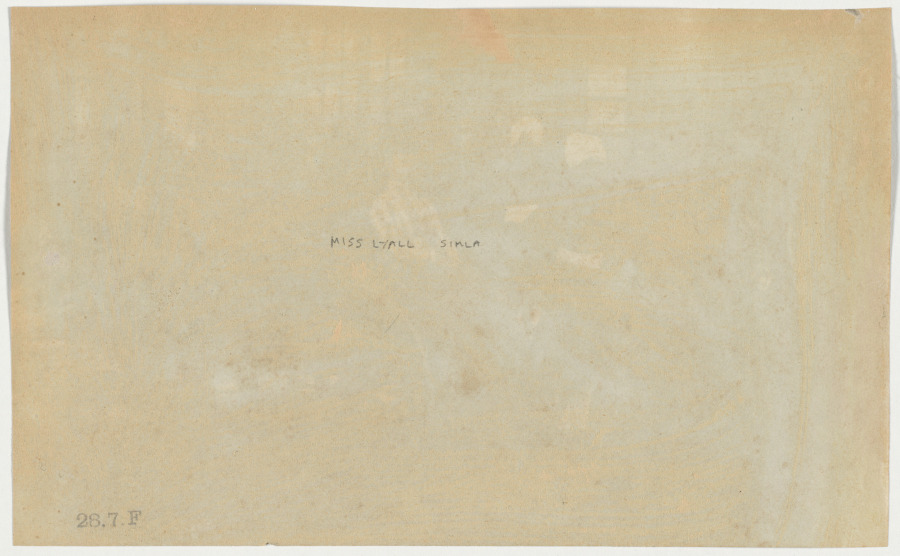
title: Miss Lyall, Shimla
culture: India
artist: Raja Deen Dayal (Indian, 1844–1905)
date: 1887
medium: albumen print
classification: Photograph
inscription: Stamped in black ink on verso: “28.7.F” Written in pencil on verso: “Miss Lyall Simla”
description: A number of Deen Dayal’s Simla portraits include rickshaws, which were items of great novelty, being found in India only in Simla at the time. The two-wheeled, human-powered passenger cart first appeared in Japan around 1870 and was introduced to Simla around 1880 by a Scottish missionary. The town’s steep hills required four drivers, two to pull and two to push. Horse-drawn buggies were another common means of transport.